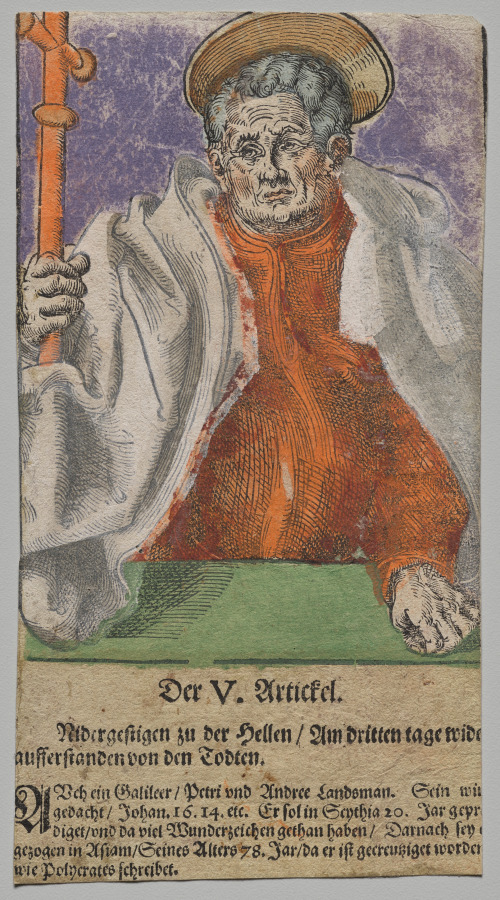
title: Philip from Christ, the Apostles, and Saint Paul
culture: Germany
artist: Lucas Cranach the Elder, After (German, 1472–1553)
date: 1563/64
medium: Woodcut with letterpress text, hand colored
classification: Print